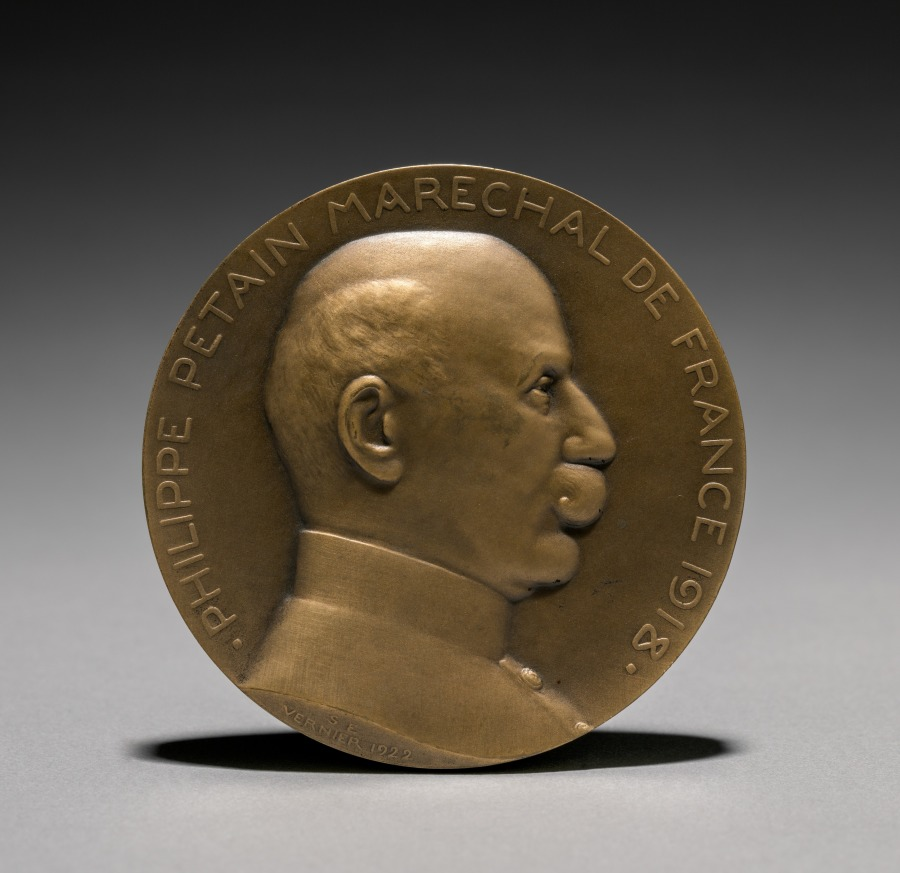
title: Petain Medal (obverse)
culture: France, early 20th century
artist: Èmile Séraphin Vernier (French, 1852–1927)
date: 1922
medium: bronze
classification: Metalwork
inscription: "Philippe Petain Marechal de France, 1918."